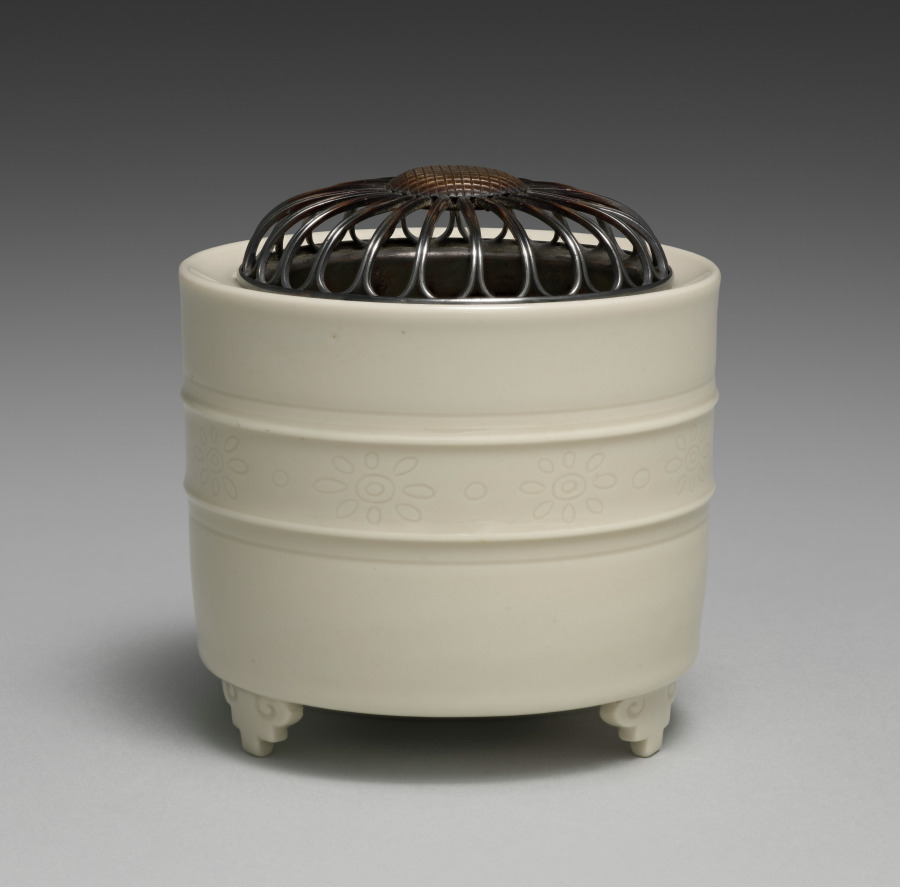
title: Incense Burner with Flowers and Dots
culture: Japan, Meiji period (1868–1912)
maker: Seifū Yohei III (Japanese, 1851–1914)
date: 1893–1914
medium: Porcelain with creamy white translucent glaze and molded and incised design with openwork silver lid in shape of flower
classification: Ceramic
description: Yohei III made incense burners in a wide variety of designs and styles. The body and glaze of this one are taihakuji, or “great white porcelain,” an important early invention Yohei III devised in 1872 that involved the combination of a distinctive translucent, creamy glaze over an ivory-colored clay body. The silver lid is meant to look like a single flower. The vessel has tapering legs with a combined curvilinear and geometric design; the bands encircling the middle have simple, incised flower motifs alternating with single dots.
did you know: This incense burner has floral motifs on both the lid and the burner.